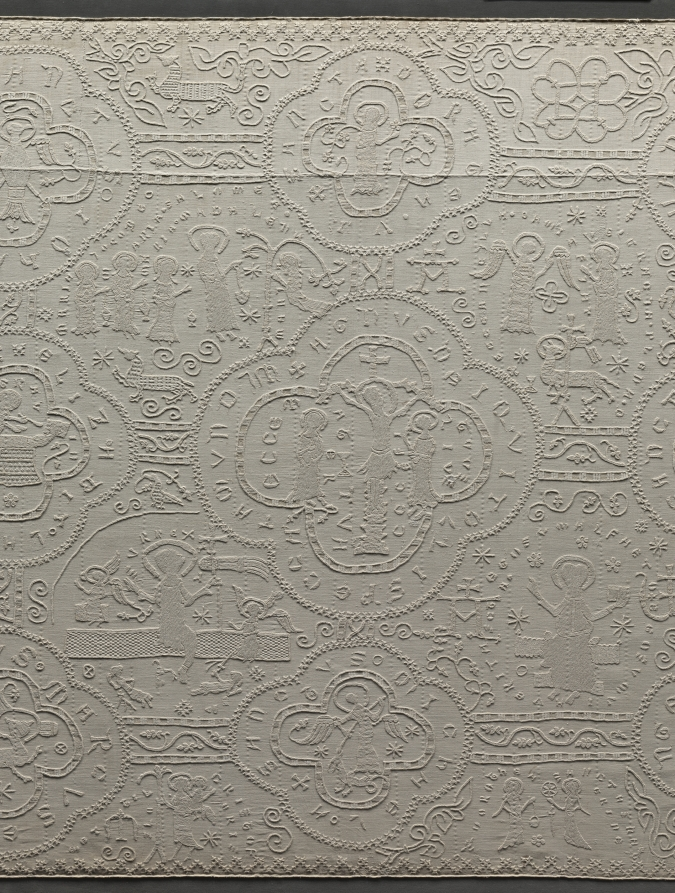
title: Altar Cloth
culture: Germany, Altenberg on the Lahn, Premonstratensian Convent, 14th century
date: c. 1350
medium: embroidery: linen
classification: Embroidery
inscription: various motifs enclosed in quatrefoils with identifying inscriptions in Gothic letters.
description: This large, embroidered altar cloth is one of the rarest, most important medieval church furnishings in existence. It was stitched by nuns in the Premonstratensian Convent in Altenberg on the Lahn River, north of Frankfurt, Germany, and was used to cover the church’s high altar in the weeks leading up to Easter. The cloth is an example of linen embroidery, a specialty of German nuns in the later Middle Ages. The Altenberg monastery church once had valuable furnishings; the high altar retable (a decorated frame with sculptures and paintings on the top of an altar) has survived, the main parts of which are now in the Städel Museum in Frankfurt, Germany.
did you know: When lit from behind, the previously hidden details emerge and the complex design becomes evident.